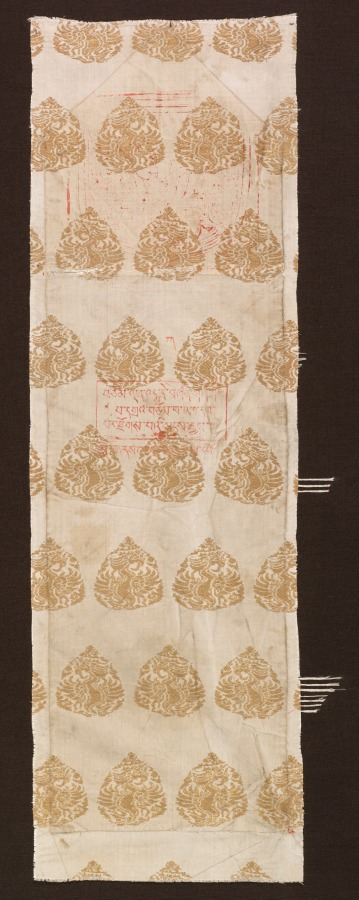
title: Brocade with Phoenixes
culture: Central Asia, Jin dynasty (1115-1234)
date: 1100s–1200s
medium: tabby, brocaded; silk and gold thread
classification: Textile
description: This elegant brocade of phoenixes, seen almost frontally, is woven with gold thread made from flat strips of gilded paper instead of the usual strips of gilded parchment. This suggests that the textile was woven in the southern part of the Jin state that had been annexed from the Chinese. Although probably intended to serve as secular clothing, this textile ended up in a Buddhist institution. The end was folded and stamped in red ink with a seated Buddha flanked by two Bodhisattvas (now faint and upside down). Two Tibetan inscriptions were also stamped (translation: "The Bhagavan, the Tathagata, the Arhat, the completely perfect Buddha," and "Salutations to Blo gnas.") Above, an isolated letter ka indicates that the textile was used to cover the first volume of a set of books.